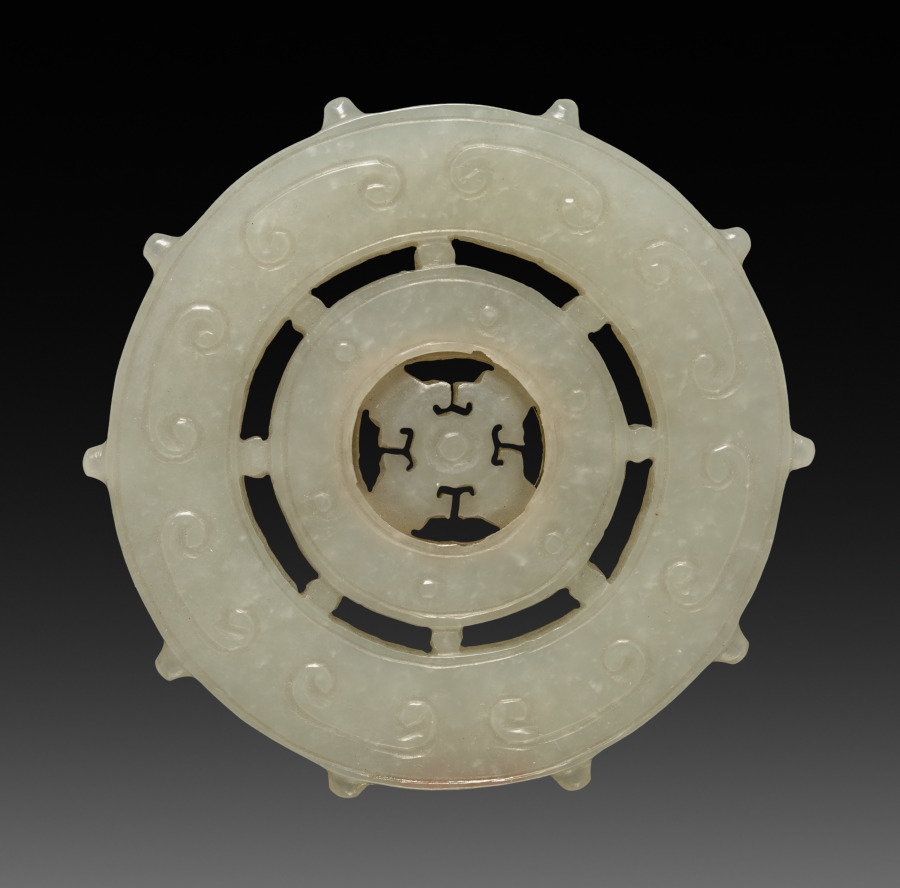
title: Ornament - Wheel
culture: China, Qing dynasty (1644–1911), Qianlong reign (1736–95)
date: 1736–95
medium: white jade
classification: Jade